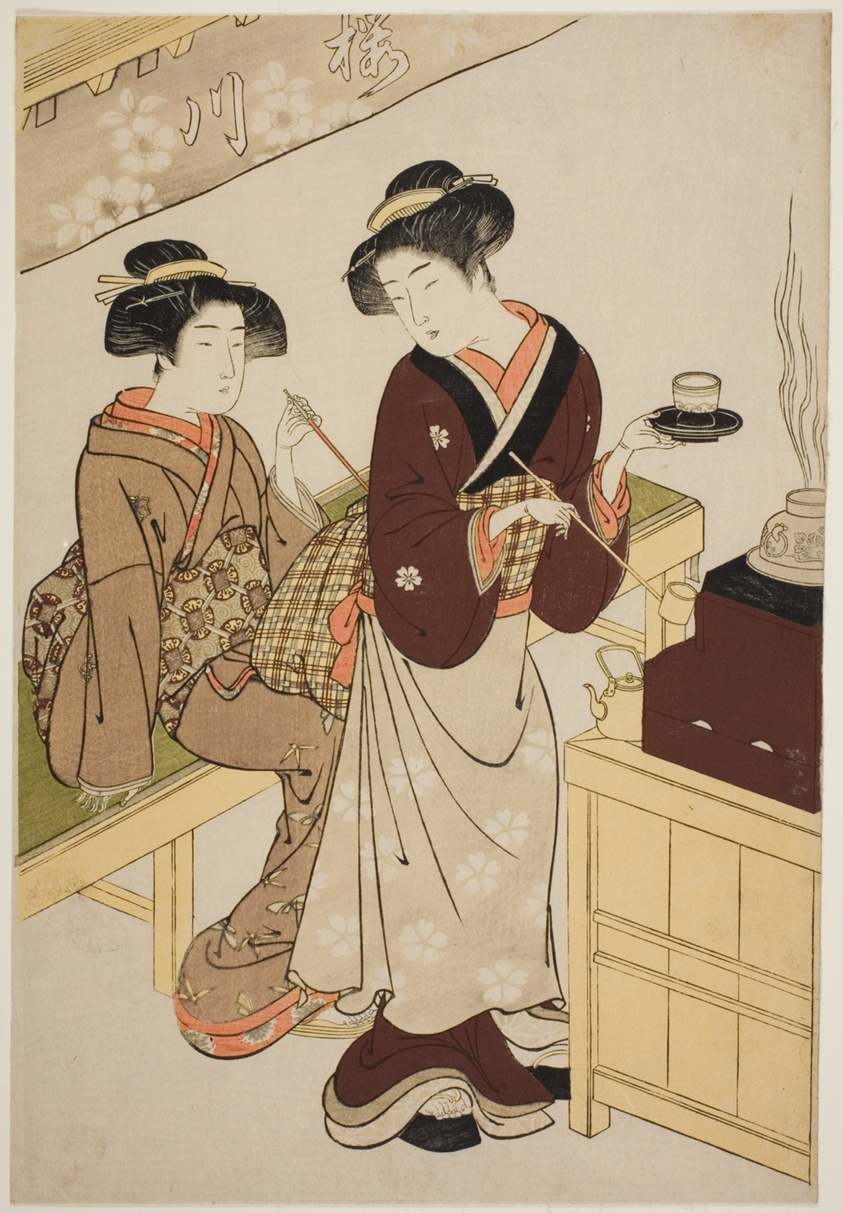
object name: Print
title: The Sakuragawa Teahouse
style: Japanese (culture or style)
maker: Attributed to Kitao Shigemasa; Japanese, 1739-1820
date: c. 1777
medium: Color woodblock print; oban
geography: Japan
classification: woodblock print; print; asian art